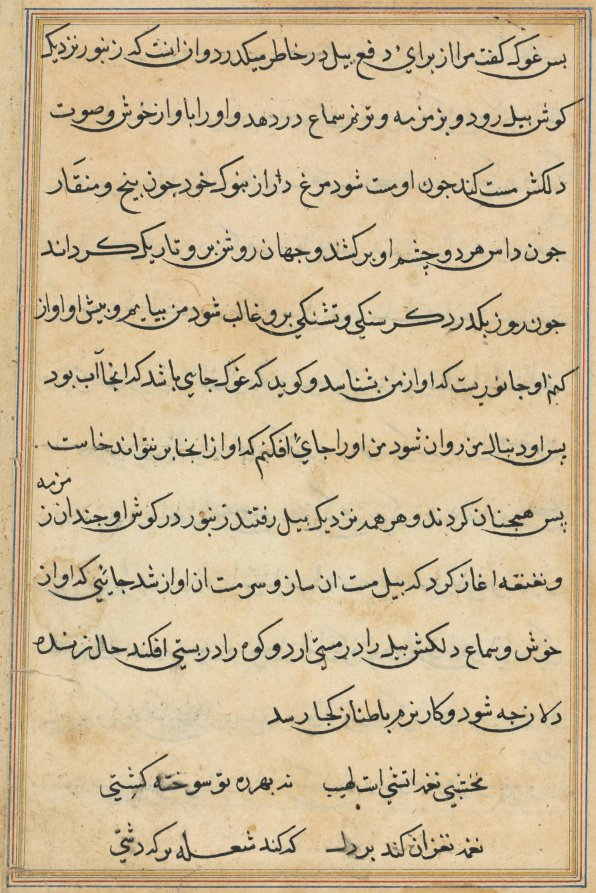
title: Page from Tales of a Parrot (Tuti-nama): text page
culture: Mughal India, court of Akbar (reigned 1556–1605)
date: c. 1560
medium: gum tempera, ink, and gold on paper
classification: Painting